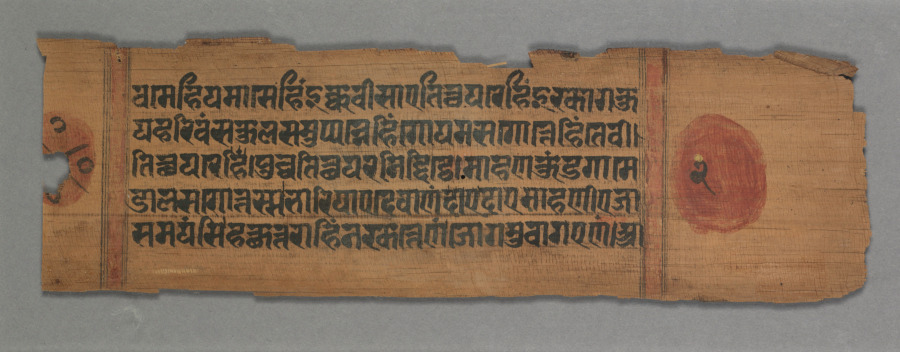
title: Text: Folio 2 (verso), from a Kalpa-sutra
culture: Western India, Gujarat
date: c. 1275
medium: gum tempera and ink on paper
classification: Painting